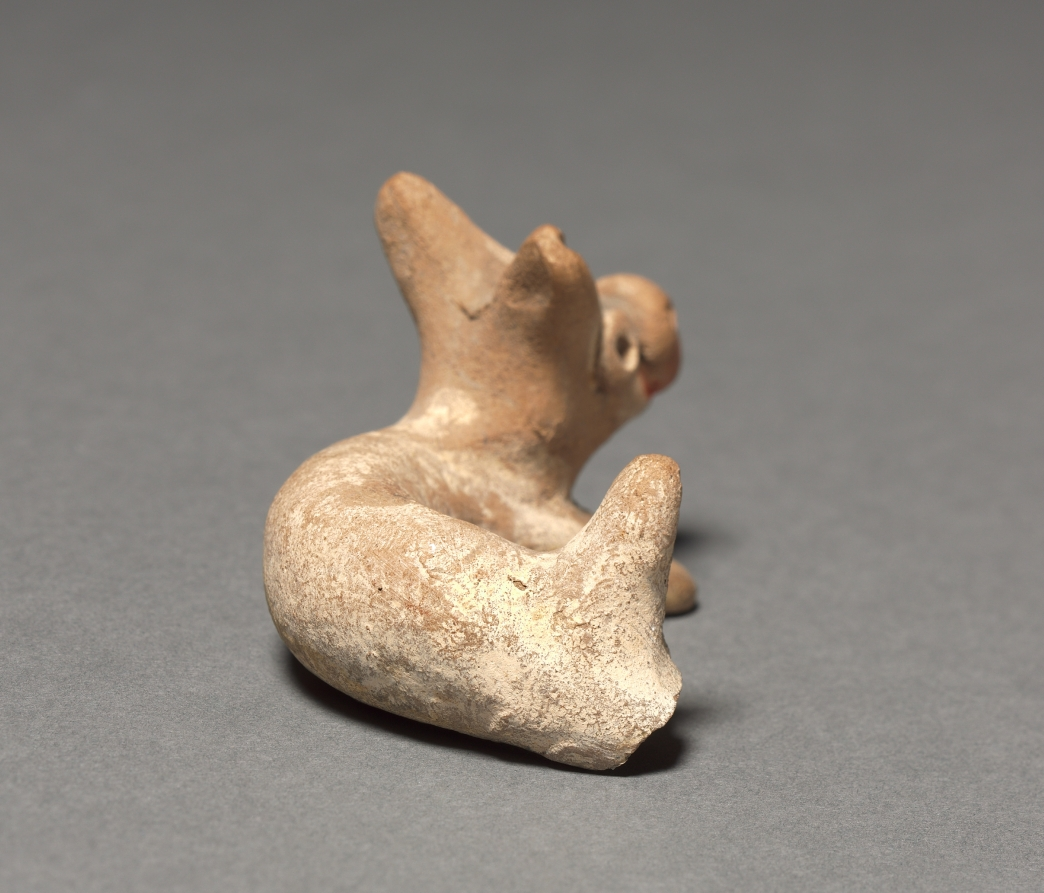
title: Animal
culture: Mexico, Western, Colima (?)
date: 200 BCE–300 CE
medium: terracotta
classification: Ceramic